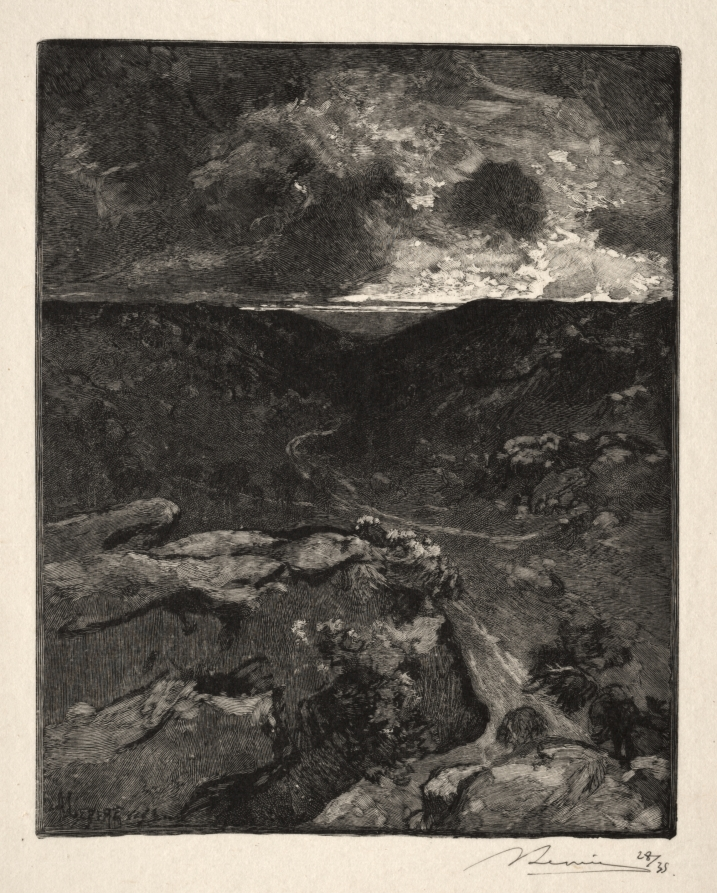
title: La vallèe de Franchard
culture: France, 19th-20th century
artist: Auguste Louis Lepère (French, 1849–1918)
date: 1888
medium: wood engraving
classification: Print